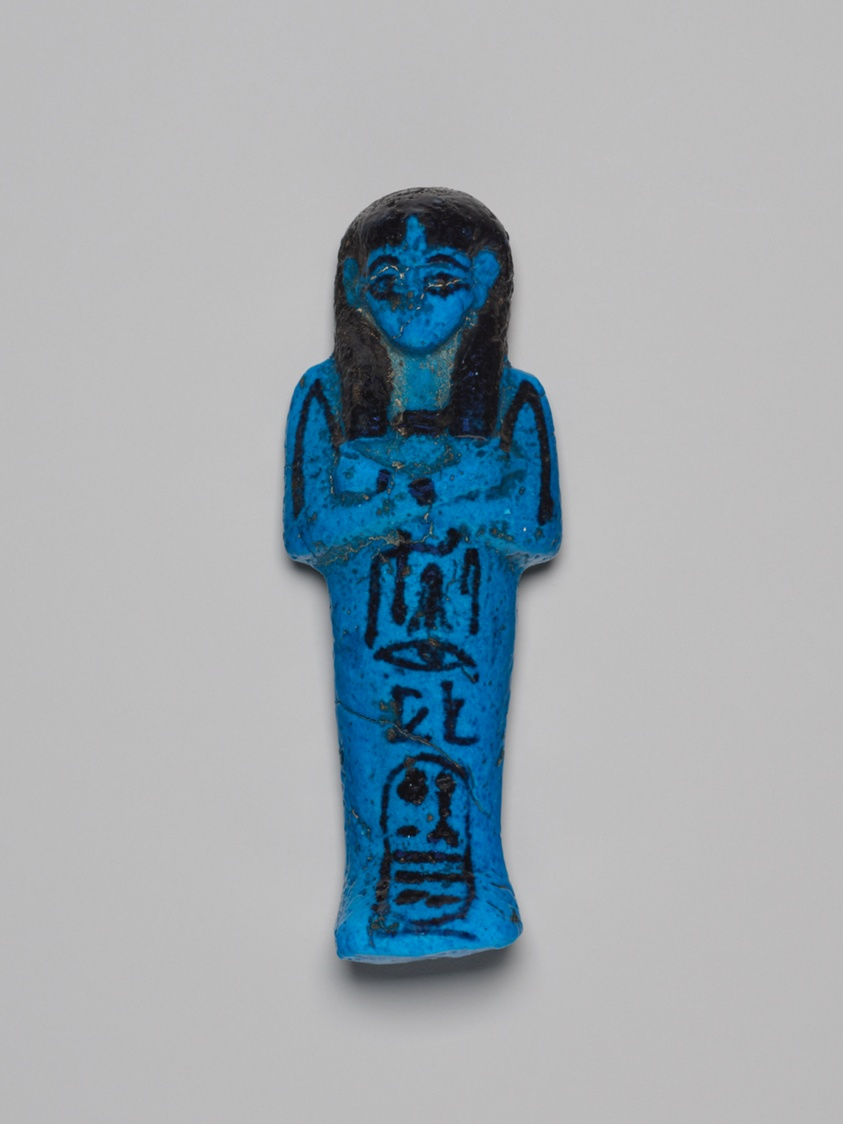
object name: Funerary Object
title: Shabti of Queen Henuttawy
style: third intermediate period, ancient, egyptian, twenty-first dynasty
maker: Egyptian; Theban Tomb 320, First Royal Cache, Deir el-Bahri, Thebes (modern Luxor), Egypt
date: Third Intermediate Period, Dynasty 21, reign of Psusennes I (about 1039–991 BCE)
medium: Faience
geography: Egypt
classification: ushabti; ceramics; funerary; figurine; ancient art; faïence (composite material)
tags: mummies, Hieroglyphs, queens